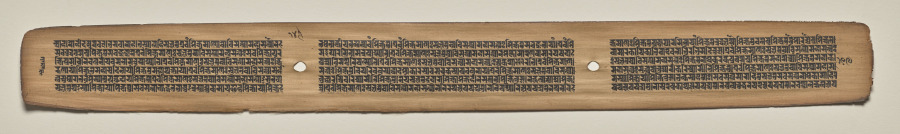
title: Text, Folio 149 (verso), from a Manuscript of the Perfection of Wisdom in Eight Thousand Lines (Ashtasahasrika Prajnaparamita-sutra)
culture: Eastern India, Bihar, Vikramashila Monastery. Painting: Nepal, Kathmandu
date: Sunday, September 14, 1119 (year 239 of the Newar Samvat in the month of Ashvina)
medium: gum tempera and ink on palm leaves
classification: Painting